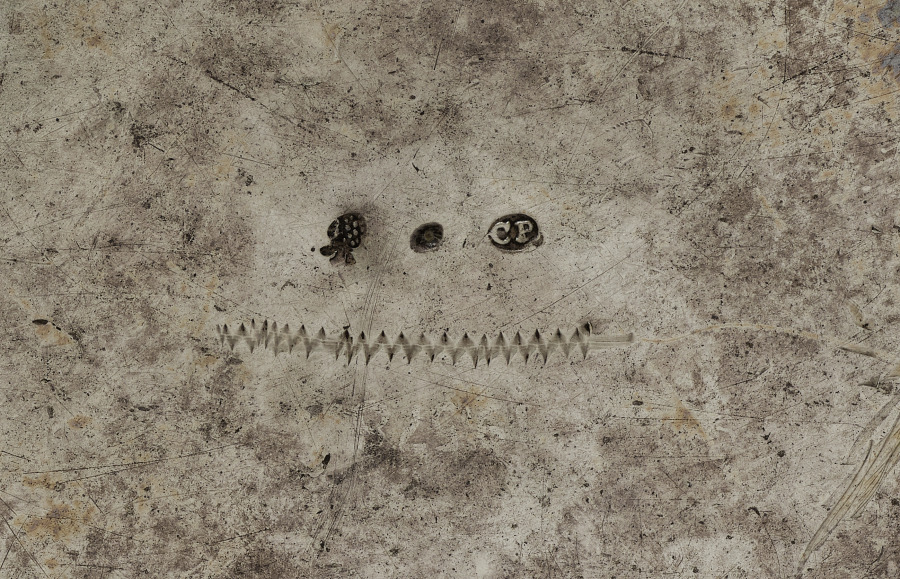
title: Tankard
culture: Germany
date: 1600s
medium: silver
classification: Silver